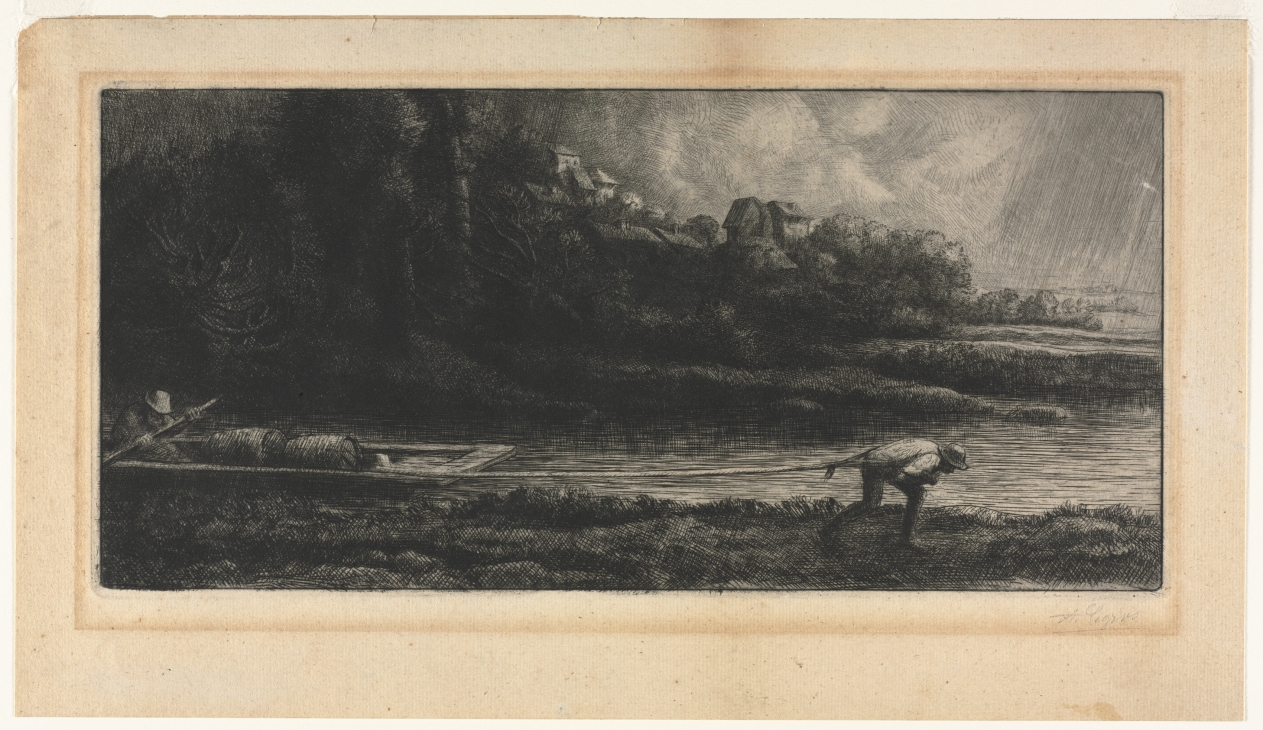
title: Le Paysage au Bâteau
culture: France, 19th century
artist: Alphonse Legros (French, 1837–1911)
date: c. 1857–1911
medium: etching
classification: Print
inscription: signed in pencil and on plate